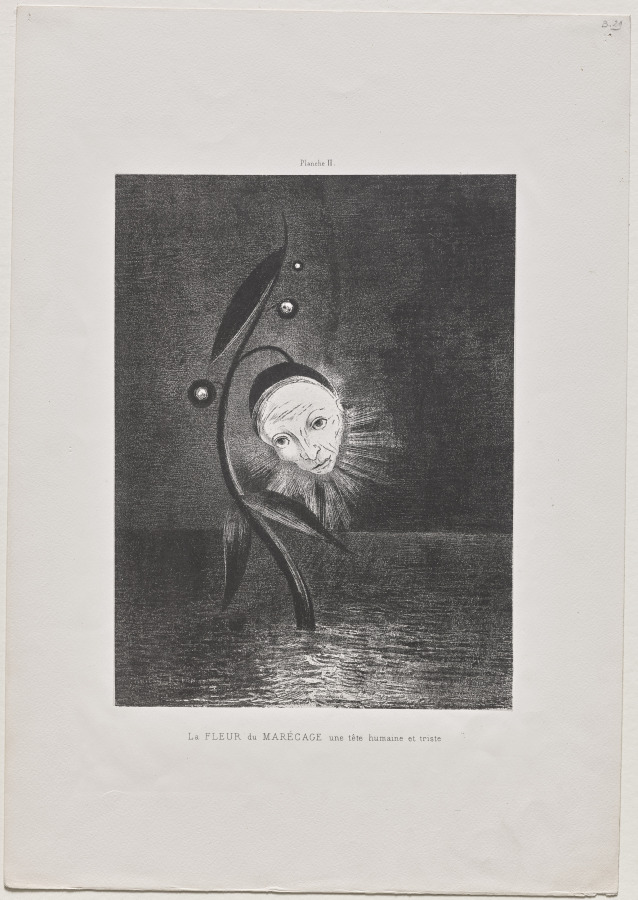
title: The Marsh Flower, a Sad Human Head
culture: France, 19th century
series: Homage to Goya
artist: Odilon Redon (French, 1840–1916)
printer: Lemercier & Cie.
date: 1885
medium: lithograph on China paper laid on wove paper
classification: Print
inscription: printed above image at center: Planche II.; below image at center: La FLEUR du MARÉCAGE une tête humaine et triste.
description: This series is one of many that Odilon Redon created throughout his career. Nearly two-thirds of his lithographs took the form of portfolios—prints connected conceptually by a theme or narrative and physically by a folder or binding. Such works were often dispersed over time, but Cleveland was fortunate to acquire several complete sets with their original covers during the 1920s. Dating from Redon’s early experimentation with lithography, Homage to Goya was intended as a tribute to 18th-century Spanish master Francisco de Goya, whose interest in dreams and the subconscious influenced Redon. The six seemingly unrelated images celebrate Goya’s ambiguity and collectively suggest the introspection and isolation of artistic practice.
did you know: This portfolio was published in an edition of 50, one of which Redon sent to poet Stéphane Mallarmé soon after Redon became a frequent participant in a literary salon held regularly at Mallarmé's home.